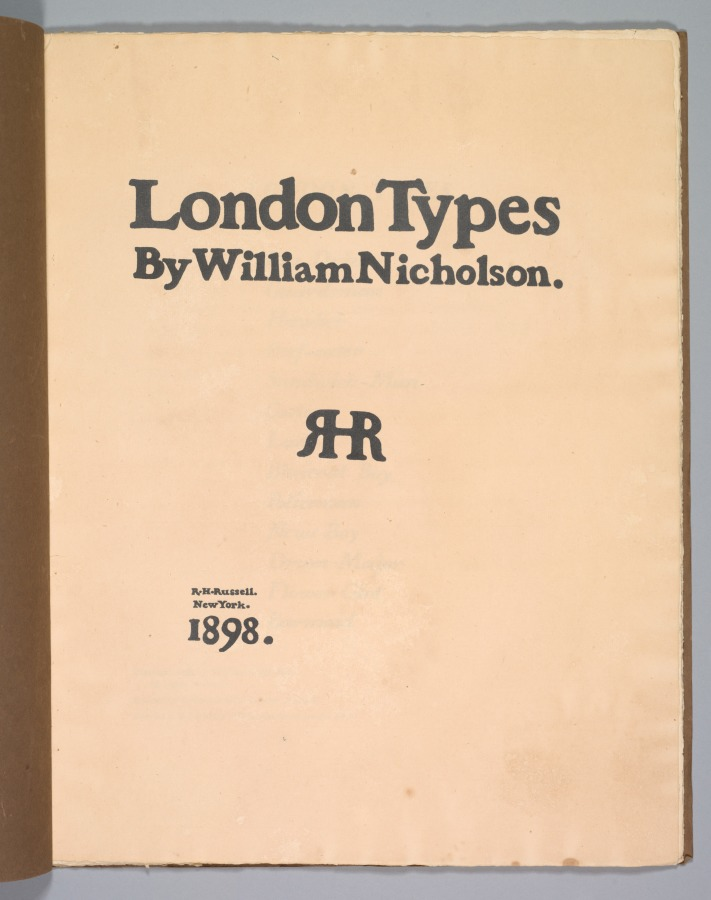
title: London Types: Quatorzains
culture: England, 19th century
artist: William Nicholson (British, 1872–1949)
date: 1898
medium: original brown paper portfolio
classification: Portfolio